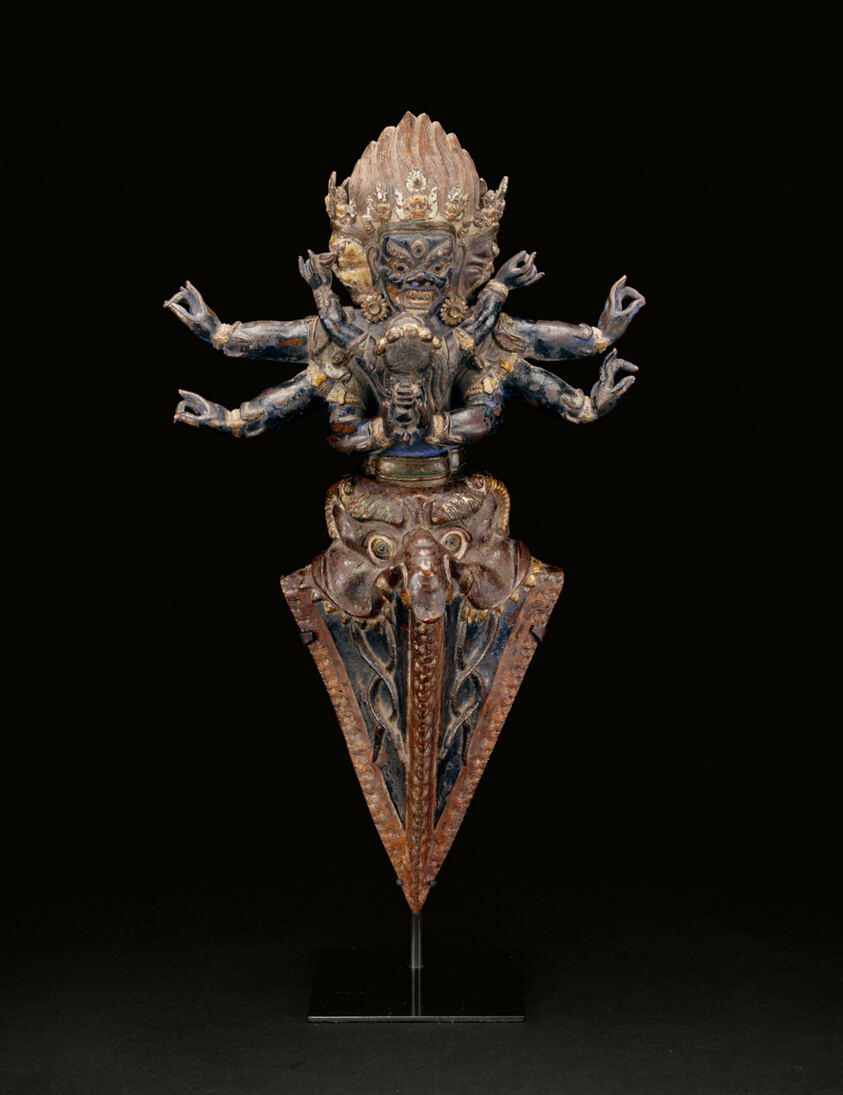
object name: Religious/Ritual Object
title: Personified Ritual Dagger (Vajrakila) in Ritual Embrace (Yab-yum)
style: Himalayan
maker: Tibet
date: 16th century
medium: Copper repoussé over wood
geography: Tibet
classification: decorative object/ornament; asian art; ritual objects